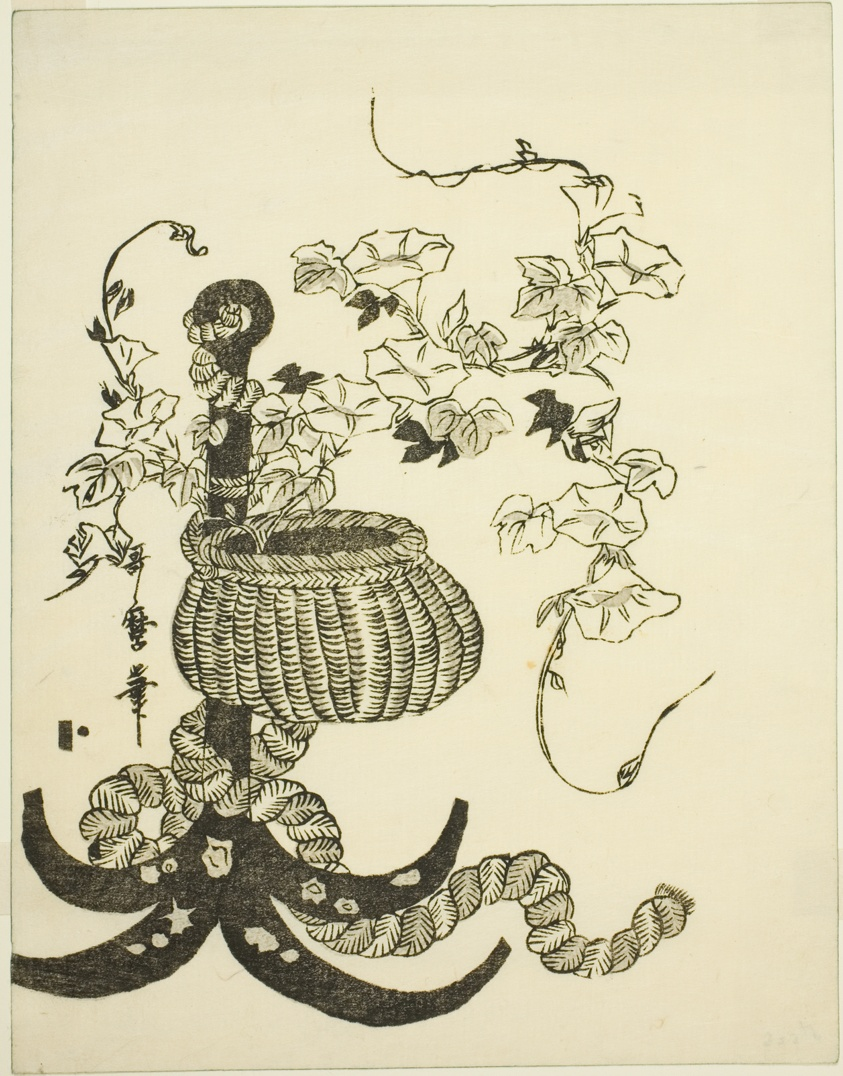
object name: Print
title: An Arrangement of Morning Glories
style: Japanese (culture or style)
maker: Kitagawa Utamaro 喜多川 歌麿 (Japanese, 1753 (?)-1806)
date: c. 1796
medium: Color woodblock print; chuban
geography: Japan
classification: woodblock print; print; asian art